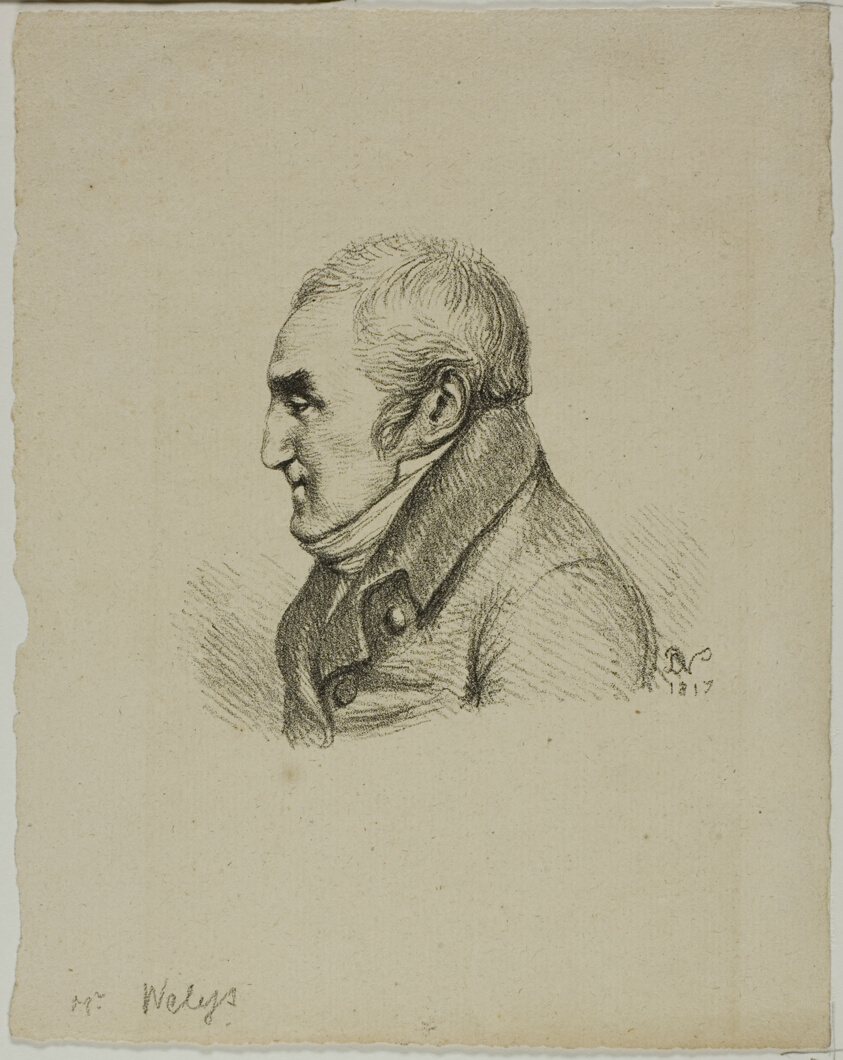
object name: Print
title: Portrait of Monsieur Nelys in Profile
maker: Dominique-Vivant Denon (French, 1747-1825)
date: 1817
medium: Lithograph in black on cream laid paper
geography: France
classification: lithograph; print; prints and drawing